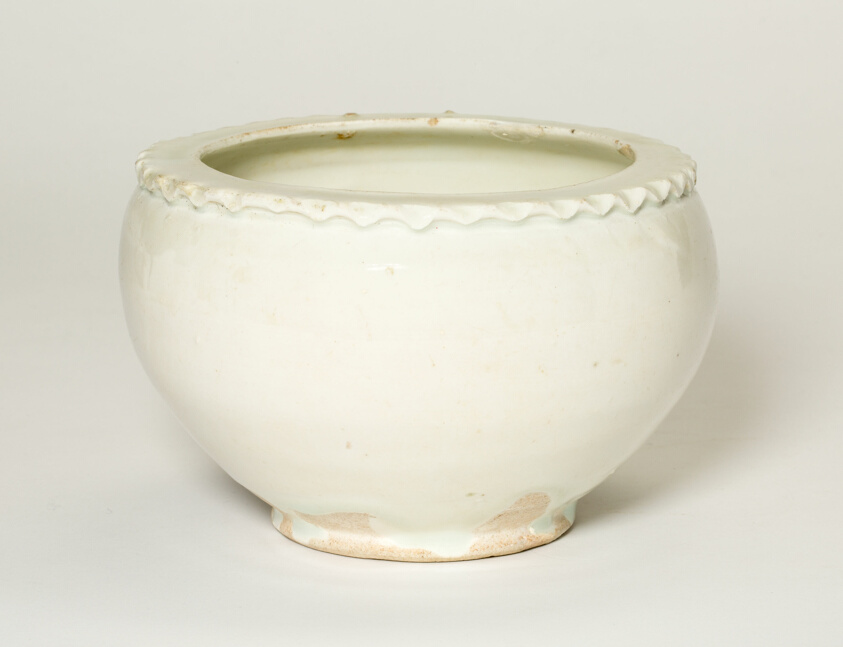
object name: Vessel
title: Jar with Fluted Rim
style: Chinese (culture or style)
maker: China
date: Northern Song dynasty (960–1127), 10th century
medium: Ding ware; glazed porcelain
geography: China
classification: ceramics; asian art; vessel